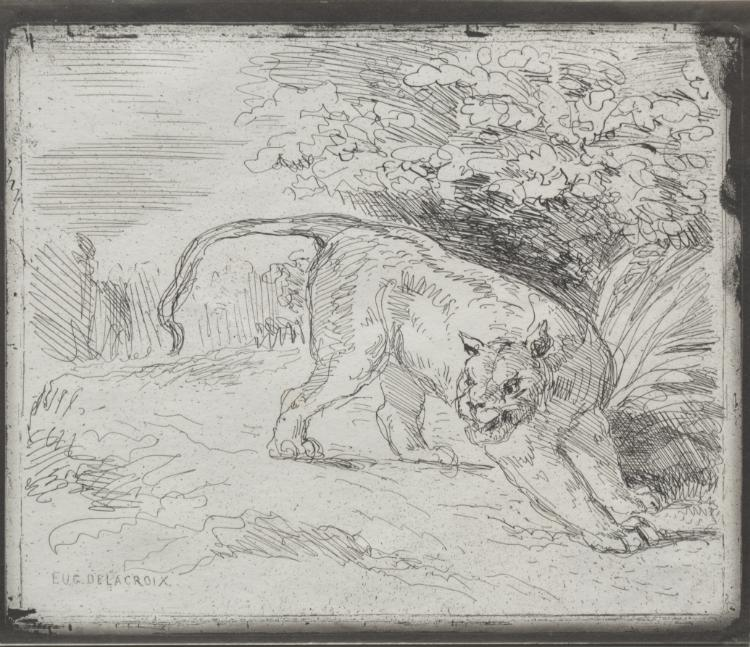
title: A Trapped Tiger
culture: France, 19th century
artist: Eugène Delacroix (French, 1798–1863)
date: 1854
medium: cliché-verre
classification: Print